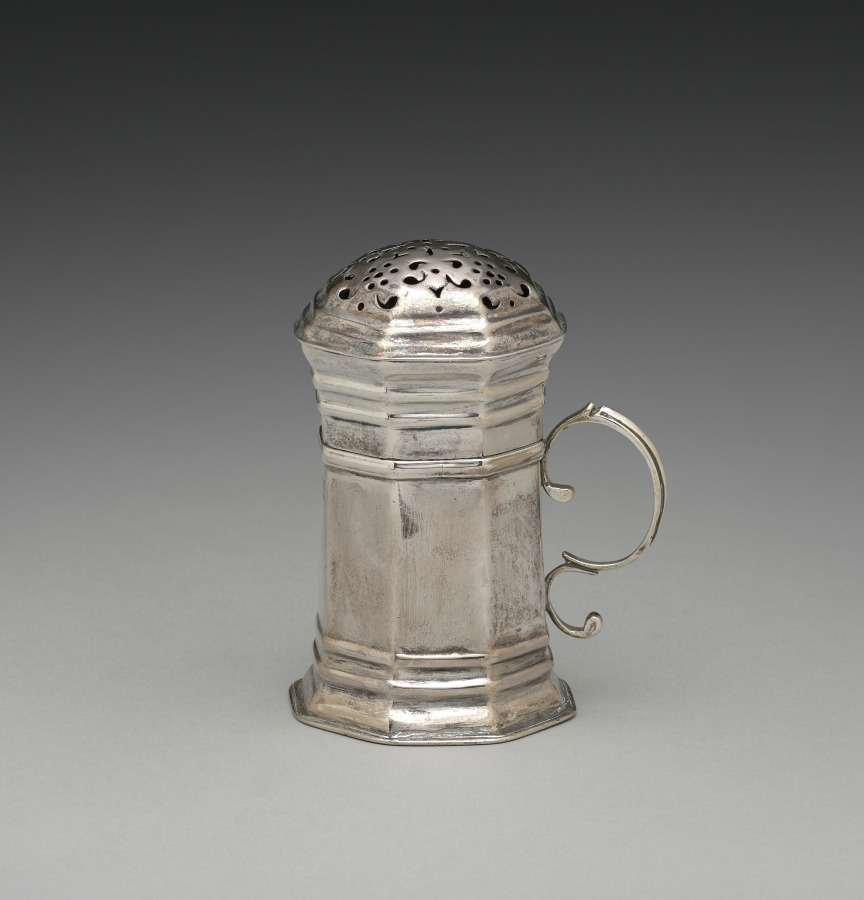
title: Caster with Lid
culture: America, Massachusetts, Boston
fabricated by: Andrew Tyler (American, 1692–1741)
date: c. 1720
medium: silver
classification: Silver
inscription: engraved: "M" over "D * L" in shaded block letters on bottom, and "AM" in block letters on front, opposite handle.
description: A caster was used to spread a finely ground substance, probably pepper.